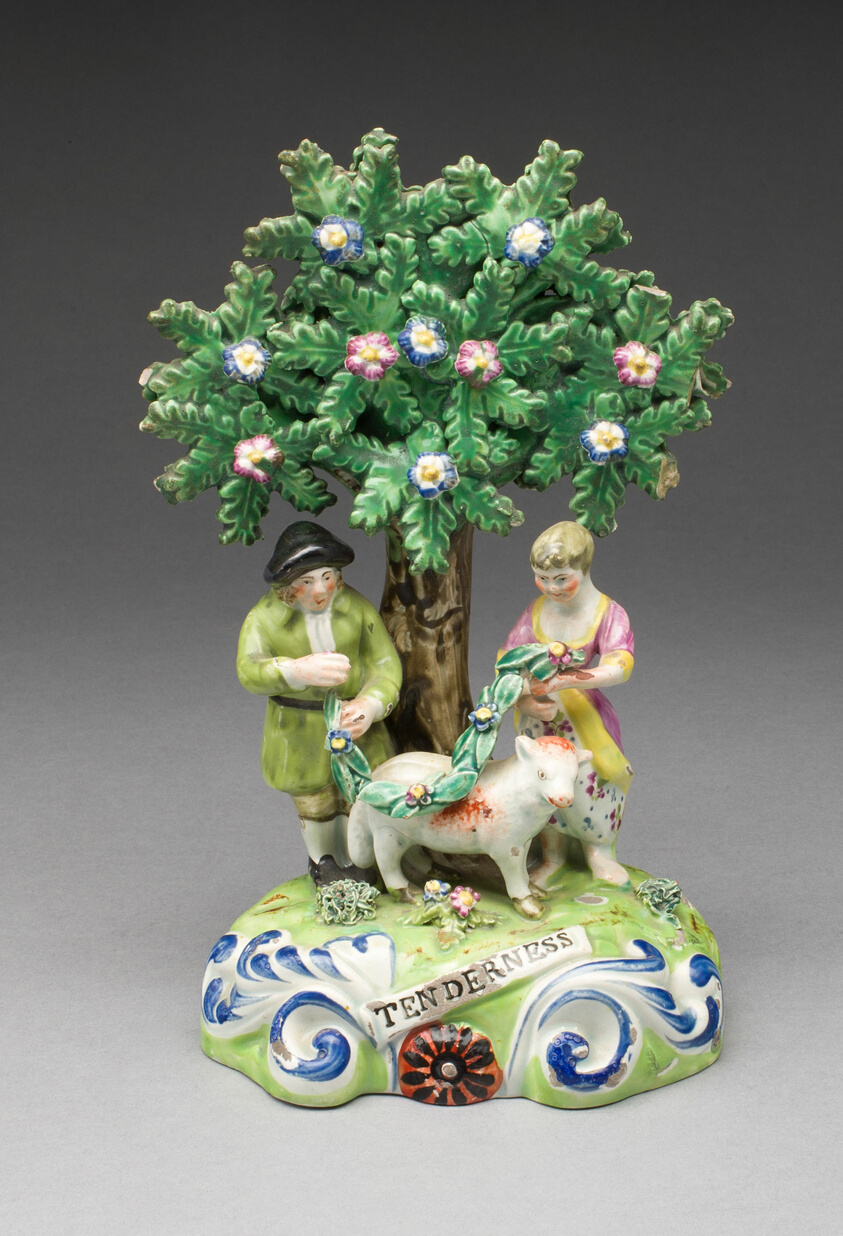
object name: Ceramics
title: Figure Group: Tenderness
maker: John Walton; English, 19th century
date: c. 1820/30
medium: Lead-glazed earthenware, polychrome enamels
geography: Staffordshire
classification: earthenware; ceramics; european decorative arts; lead-glazed earthenware